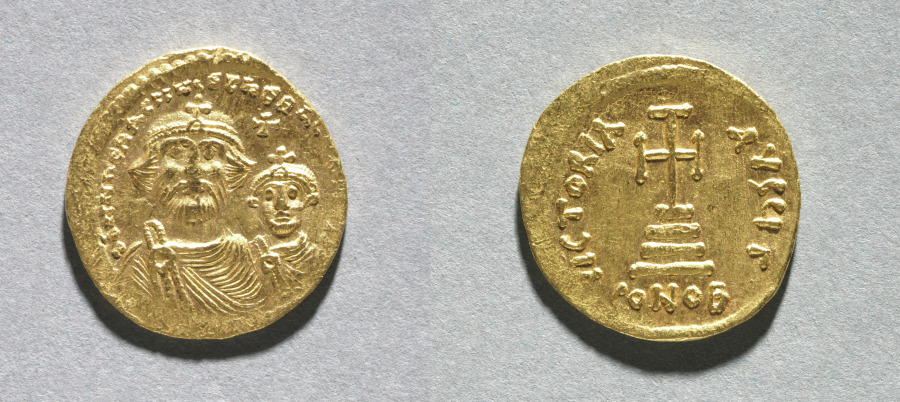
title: Solidus with Heraclius and his Son Heraclius Constantine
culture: Byzantium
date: c. 616–625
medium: gold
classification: Coins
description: Byzantine Gold Coins The vast number of surviving Byzantine coins attests to the level of trade across the empire. Controlled and supervised by the emperor, the producers of coins took care to represent his authority and reflect his stature. Talented artists were recruited to engrave the dies (molds) used for the striking of coins. Emperors increasingly came to include their heirs and co-emperors on their coinage, as well as other family members or even earlier rulers. Coins were recognized, then as now, as small, portable works of art. With their inscriptions and images, Byzantine coins provide valuable documentation of historical events and a record of the physical appearance of the emperors. The solidus is the basic gold coin of 24 karats; the tremissis, a gold coin of one-third the weight and value of the solidus; and the nomisma, which in the 10th century replaced the solidus as the standard gold coin.